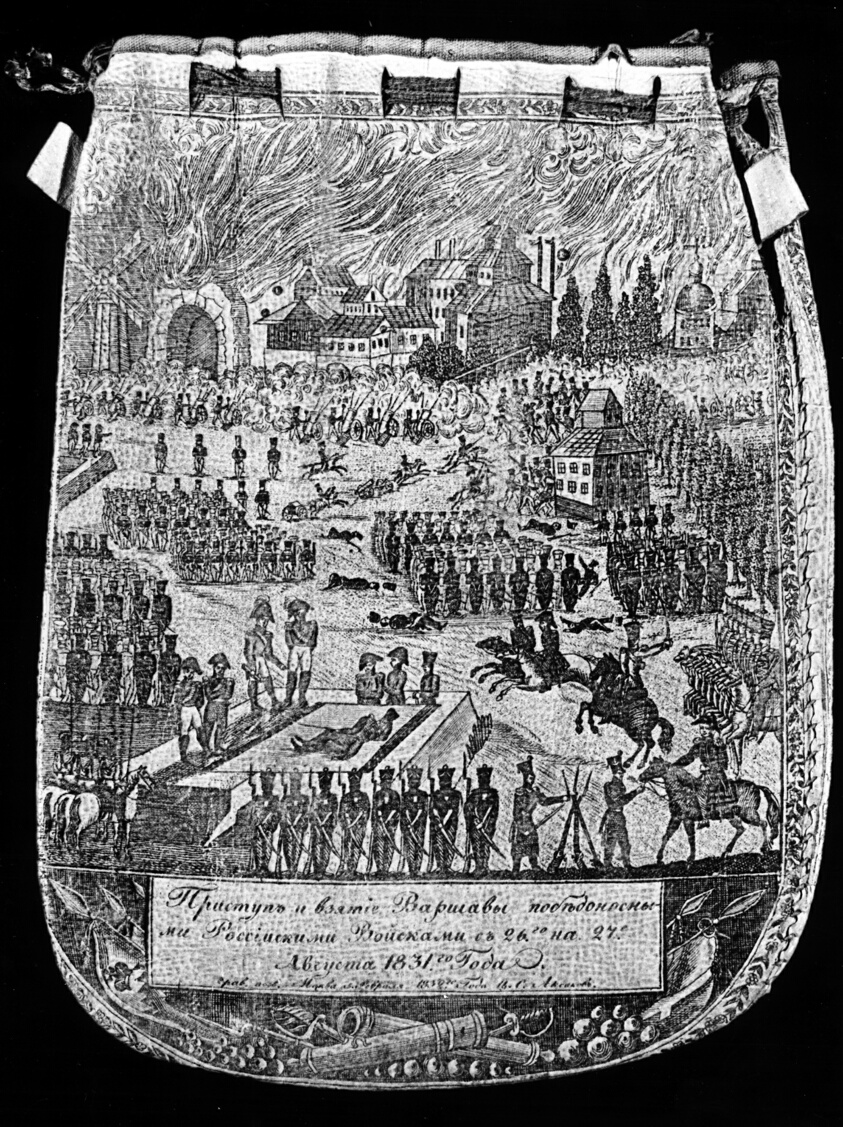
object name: Textile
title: Money Pouch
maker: After an engraving by V. S. Aksolsky (Russian, active c. 1839); Russia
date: c. 1839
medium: Kid leather; copperplate printed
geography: Russia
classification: textile; costume accessory - bag; costume accessory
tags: fashion